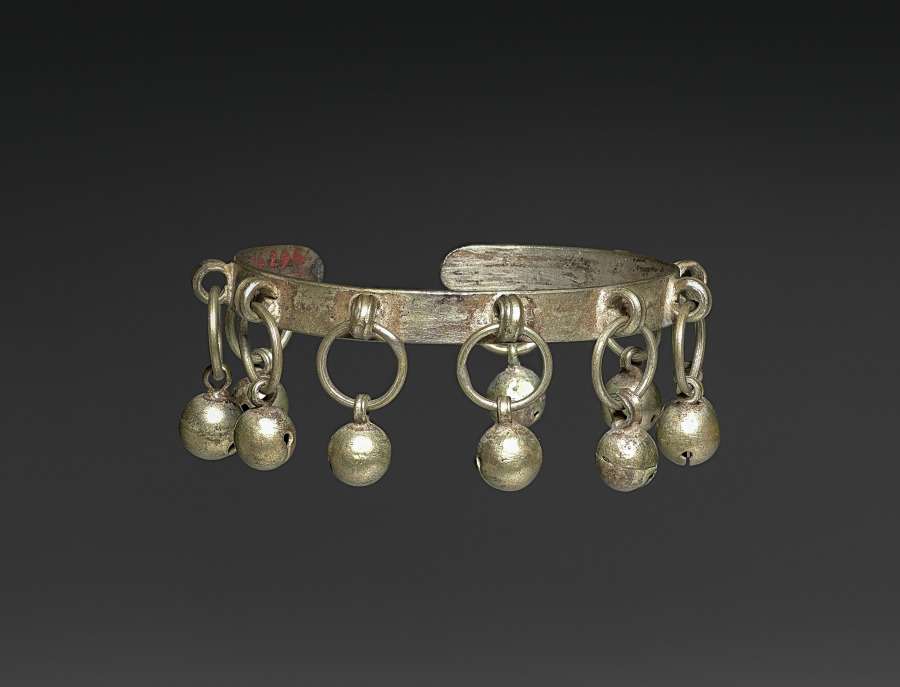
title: Wristlet or Anklet for Children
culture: India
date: early 1900s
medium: silver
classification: Jewelry